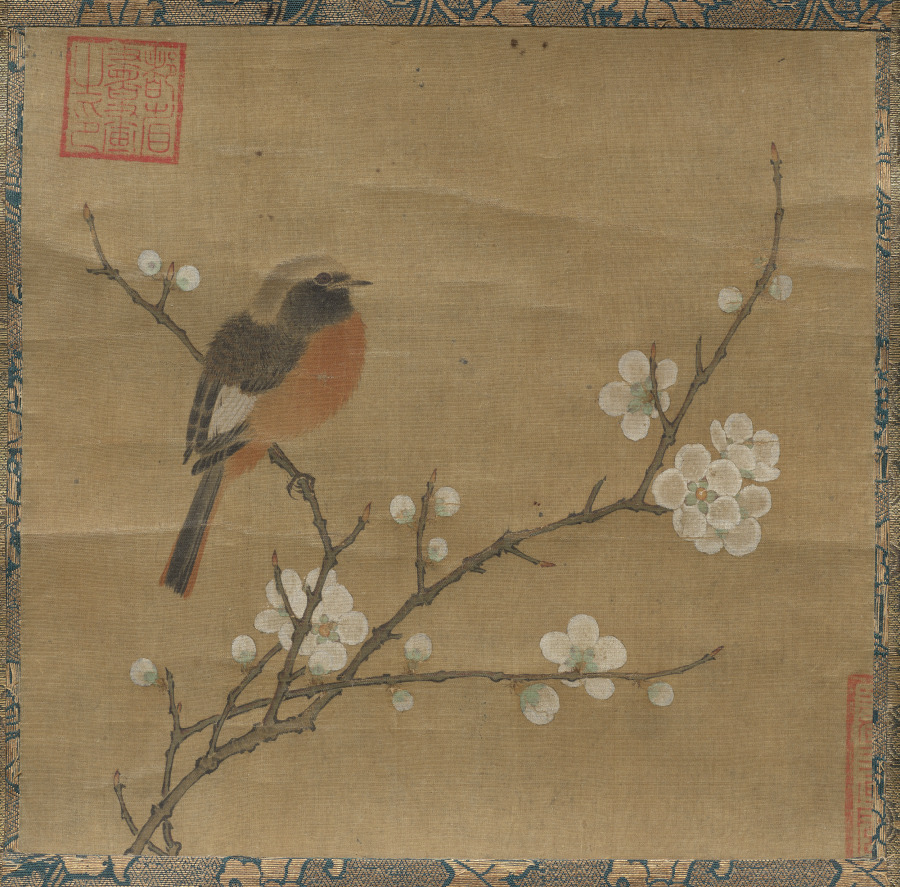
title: Bird on a Flowering Branch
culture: China, Southern Song dynasty (1127–1279)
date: 1100s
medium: album leaf mounted as a hanging scroll; ink and color on silk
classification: Painting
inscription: 2 seals: 1 official seal of the Yuan Dynasty; 1 unidentified partial seal.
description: A male redstart sits hunched on the branch of a flowering plum tree in early spring. The bird’s plumage is rendered in fine detail with a great naturalistic sense, characteristic of Southern Song court painting. While redstarts tend to spend the winter in warmer climates, they may have been seen during the mild winters in China’s southeast in Hangzhou, the seat of the former imperial painting academy where this album leaf was presumably produced. The small square painting must have once been part of an album. When collected in Japan, it was mounted as a hanging scroll, presumably to fit it in an alcove to be enjoyed during the tea ceremony.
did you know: The seal at the upper left is an official Yuan dynasty seal used on paintings and calligraphy in the imperial collection.